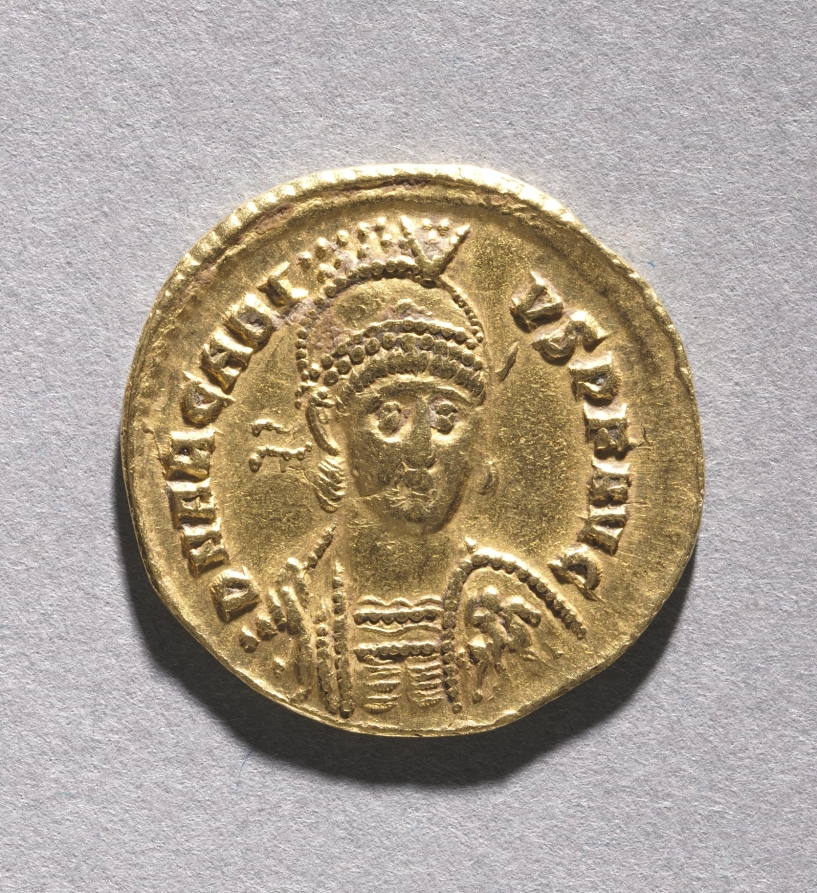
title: Tremissis of Honorius (obverse)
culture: Byzantium, Ravenna, Byzantine period, late 4th-early 5th Century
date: 395–423 CE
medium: gold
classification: Coins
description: Byzantine Gold Coins The vast number of surviving Byzantine coins attests to the level of trade across the empire. Controlled and supervised by the emperor, the producers of coins took care to represent his authority and reflect his stature. Talented artists were recruited to engrave the dies (molds) used for the striking of coins. Emperors increasingly came to include their heirs and co-emperors on their coinage, as well as other family members or even earlier rulers. Coins were recognized, then as now, as small, portable works of art. With their inscriptions and images, Byzantine coins provide valuable documentation of historical events and a record of the physical appearance of the emperors. The coins shown here include the solidus, the basic gold coin of 24 karats; the tremissis, a gold coin of one-third the weight and value of the solidus; and the nomisma, which in the 10th century replaced the solidus as the standard gold coin.